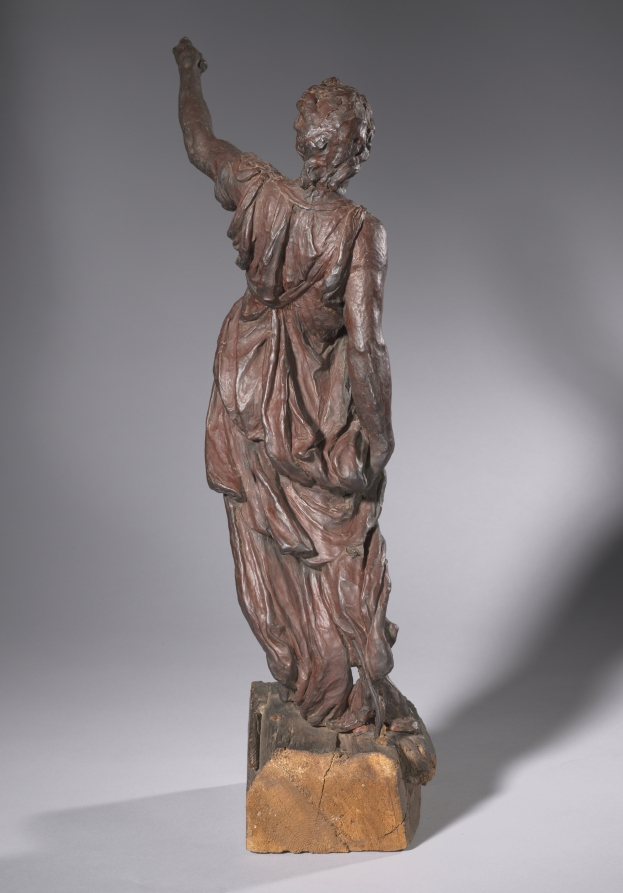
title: Model for an Angel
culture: Italy, Milan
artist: Annibale Fontana (Italian, 1540–1587)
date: c. 1583–84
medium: wax on a metal armature, mounted on wood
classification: Sculpture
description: Annibale Fontana created this wax model, perhaps in part for the patron’s approval, while preparing a sculpture for the Church of Santa Maria presso San Celso in Milan. The angel was mounted high on the facade, so the composition needed to be impeccably balanced as well as legible from the ground. Wings and a trumpet appear in the final work, but Fontana here concentrates on the deep folds, clinging drapery, and forceful pose.